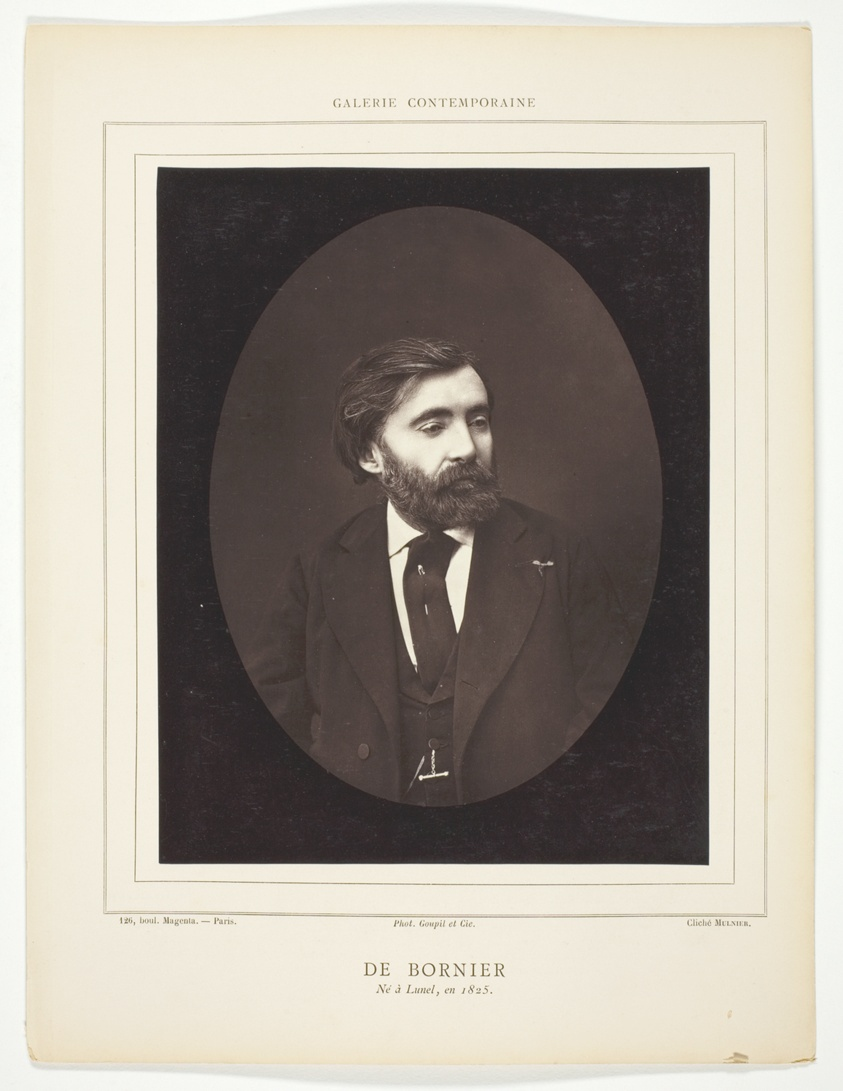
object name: Photograph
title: Henri, vicomte de Bornier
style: 19th century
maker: Ferdinand J. Mulnier (French, active 1860–1890)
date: c. 1876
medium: Woodburytype, from the periodical “Galerie Contemporaine Littéraire, Artistique” (1879), volume 8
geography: France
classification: woodburytype; photomechanical process; photography; photograph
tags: Collected by Hugh Edwards, Contemporaine Littéraire